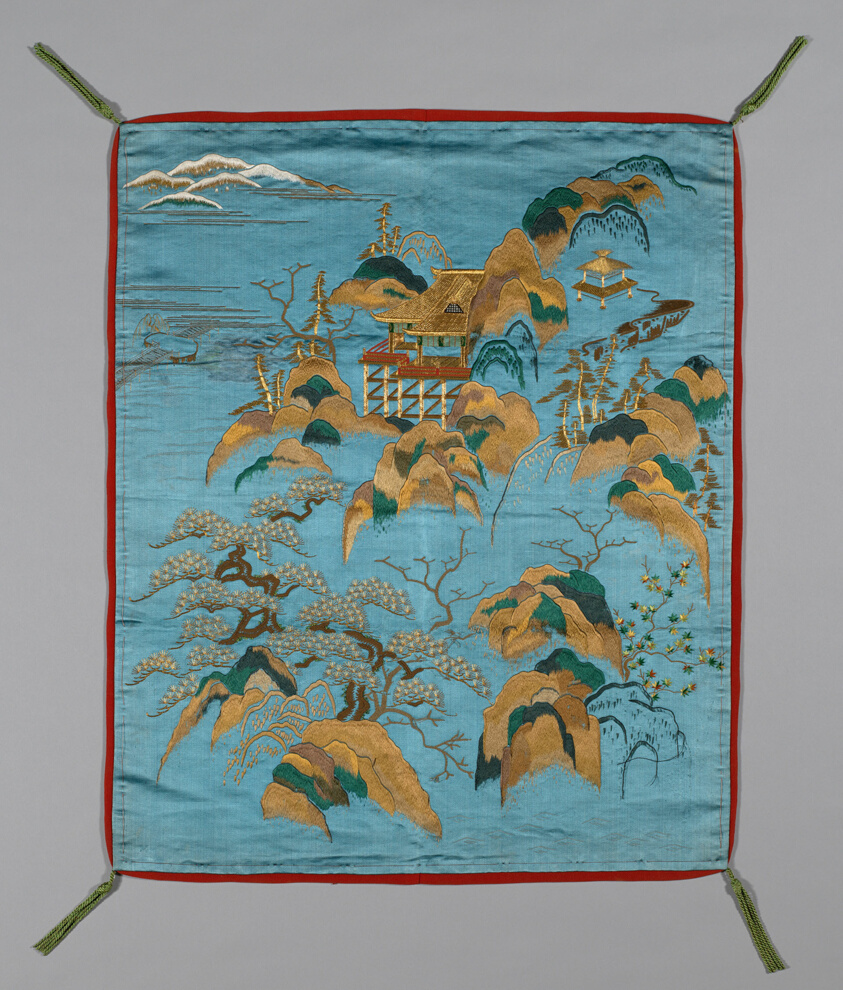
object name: Textile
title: Fukusa (Gift Cover)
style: meiji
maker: Japan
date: Meiji period (1868–1912), late 19th century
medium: Embroidered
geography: Japan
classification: textile; weaving; liturgical - buddhist